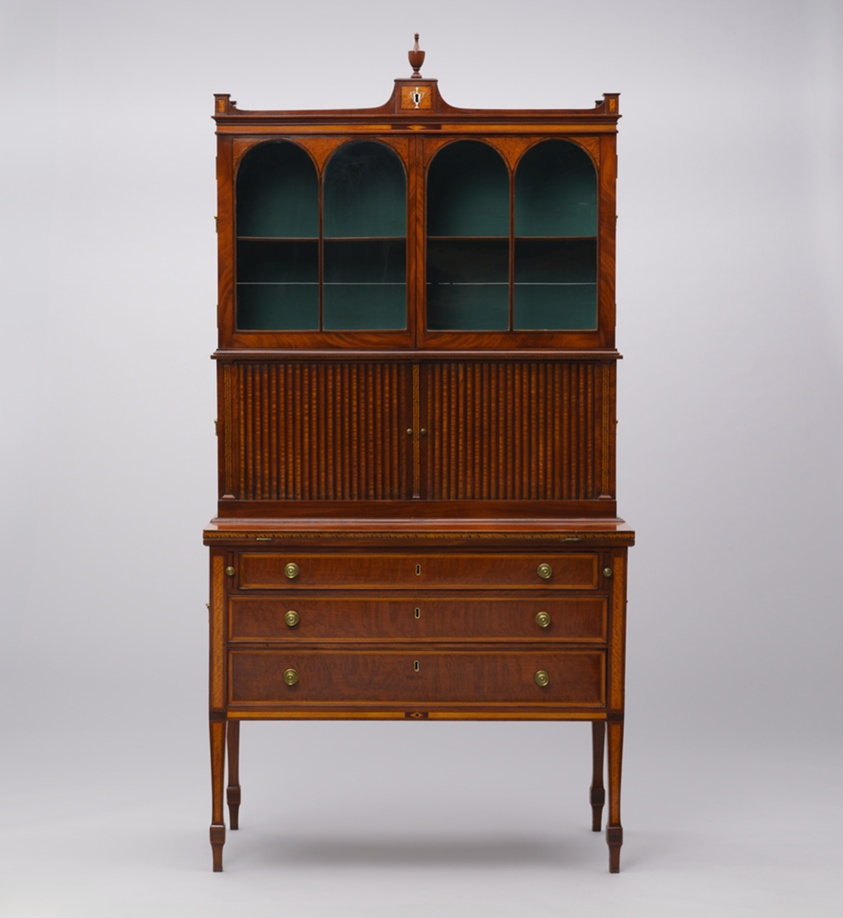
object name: Furniture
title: Tambour Desk and Bookcase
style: federal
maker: Attributed to the workshop of John and Thomas Seymour (American, active 1793–1804); Or attributed to the workshop of Thomas Seymour (American, active 1804–1817); Boston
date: c. 1800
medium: Mahogany, satinwood, white pine, cherrywood, chestnut, with brass, ivorine, and leather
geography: Boston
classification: furniture; american arts; american decorative arts; bookcase; decorative arts; desk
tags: furniture, cabinets, shelves, drawer, locks, keys, bookcase, decorative arts, desk, escutcheons